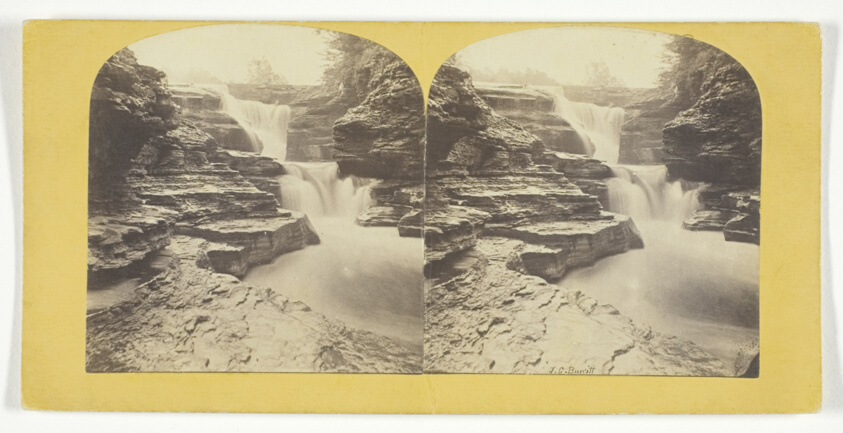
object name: Photograph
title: Fall Creek Ithaca Cascades above Irish Hammer Fall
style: 19th century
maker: J. C. Burritt; American, active 1860s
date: 1860/65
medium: Albumen print, stereo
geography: Ithaca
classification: photography; photograph; albumen silver print; stereograph (albumen)